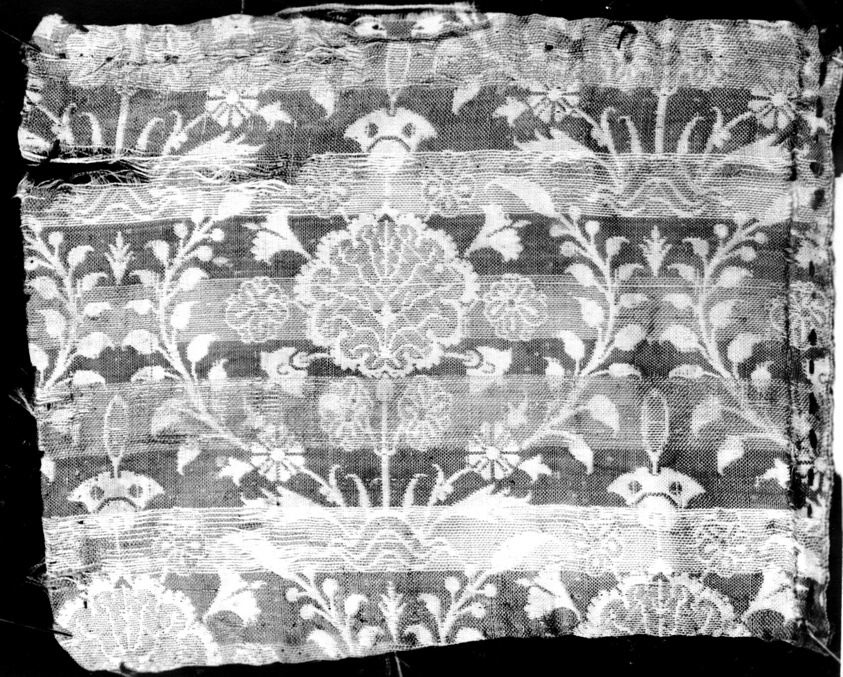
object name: Textile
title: Fragment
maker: Iran (Persia)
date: 17th century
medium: Brocaded fancy compound double cloth, silk and silver wound on white silk core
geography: Iran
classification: textile; weaving